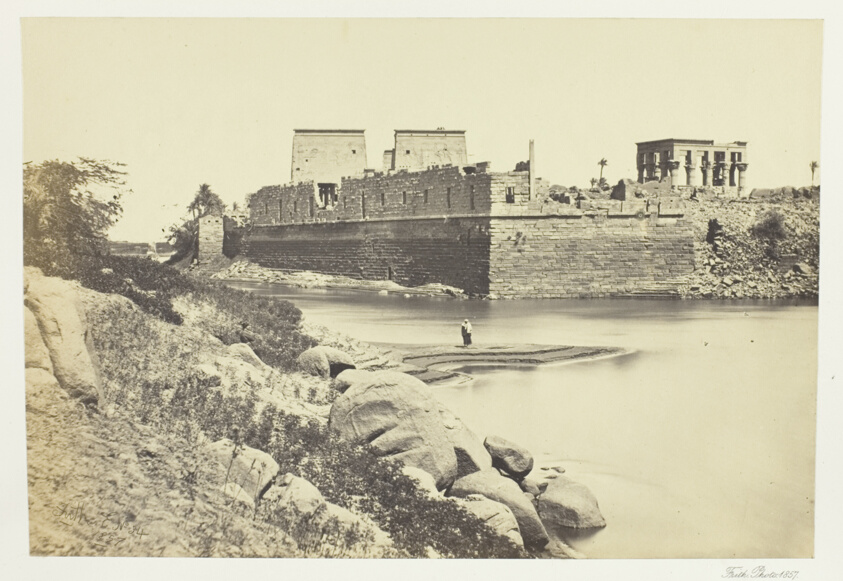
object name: Photograph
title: South End of the Island of Philæ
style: 19th century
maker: Francis Frith (English, 1822–1898)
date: 1857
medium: Albumen print, pl. 25 from the album "Egypt and Palestine, Volume II" (1858/60)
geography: England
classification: albumen silver print; photographic process; photography; photograph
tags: Collected by Hugh Edwards, Egypt and Palestine